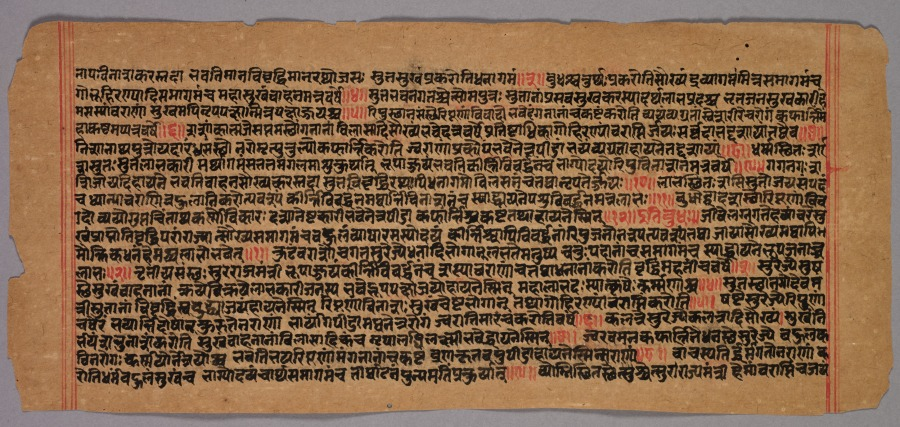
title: Page from a Jaina Manuscript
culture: India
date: 1400s–1500s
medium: ink on paper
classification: Manuscript